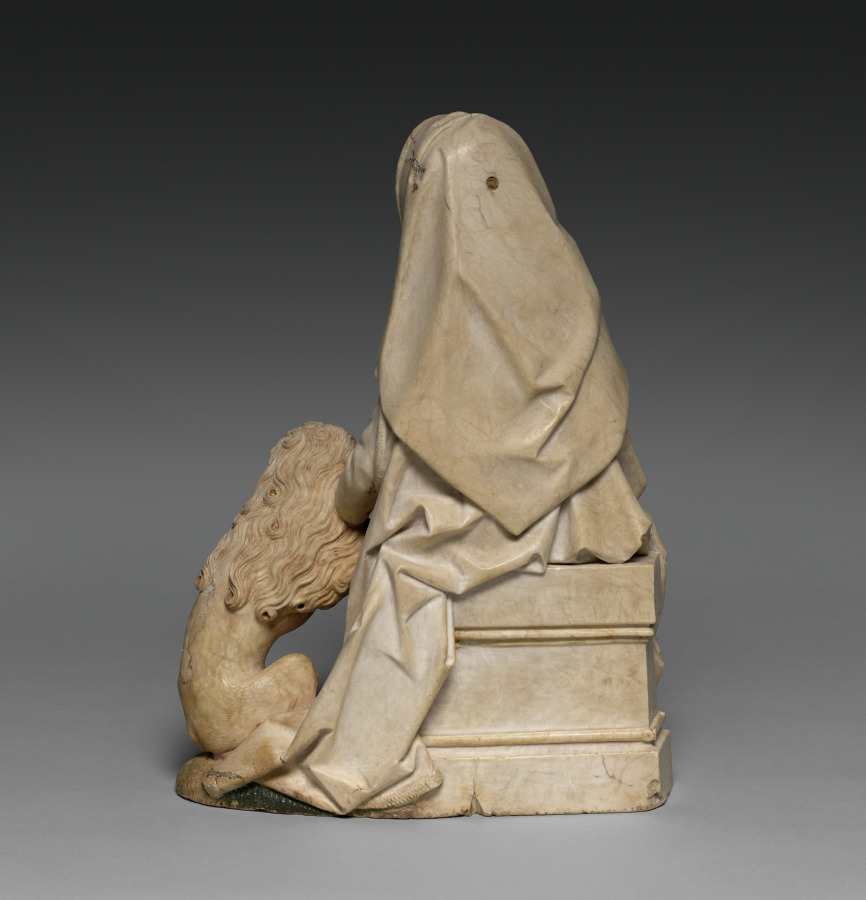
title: Saint Jerome and the Lion (From the former Church of St. Peter in Erfurt)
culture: Germany, Würzburg, late 15th Century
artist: Tilman Riemenschneider (German, active Würzburg, c. 1460–1531)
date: c. 1495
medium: alabaster, traces of polychromy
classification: Sculpture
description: According to legend, Saint Jerome (347–420 bce) lived in the desert, where he removed a thorn from an injured lion. Jerome is venerated in the Catholic Church as a Church Father, an important early author of Christianity. Here, he wears cardinal’s clothing from around 1500. Tilman Riemenschneider focused on Jerome’s relationship with the lion, creating empathy for the wounded animal. The delicacy of the depiction, which may have been partially painted to add highlights, is typical of alabaster, as is its fine polishing. The cord of the cardinal’s hat, missing today, may have been supplemented from another material.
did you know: In the story Saint Jerome encounters a fearsome lion, here depicted as diminutive, gentle, and submissive.